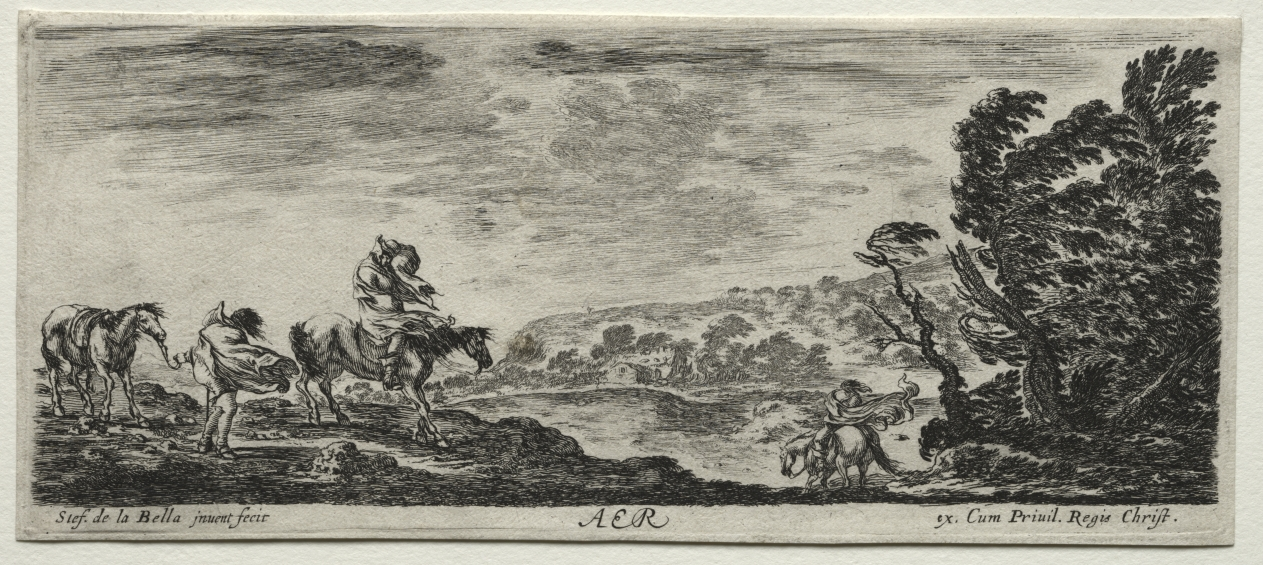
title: The Four Elements: Aer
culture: Italy, 17th century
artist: Stefano Della Bella (Italian, 1610–1664)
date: c. 1648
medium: etching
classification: Print